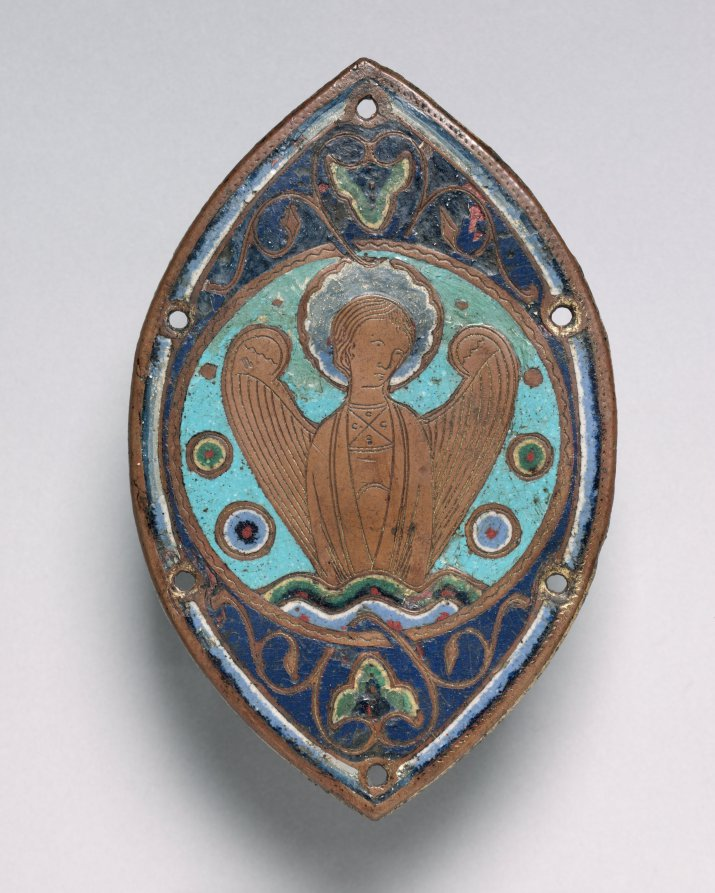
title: Enamel Plaque from the Altar Frontal of Saint Martin at Orense (Spain)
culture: France, Limoges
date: 1174–1213 (probably before 1188)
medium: copper: engraved, stippled, gilded; champlevé enamel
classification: Enamel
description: This almond-shaped enamel plaque depicts the half-length figure of an angel inscribed in a medallion. A nearly identical plaque in the cathedral treasury of St. Martin at Orense in Galicia (Northern Spain) suggests that this plaque once formed part of a large altar frontal commissioned by Bishop Alfonso of Orense (reigned 1174–1213). Fifty-three enameled plaques of this important ensemble are still preserved at the Cathedral of Orense. Others, including this one, were possibly removed during the Napoleonic era.